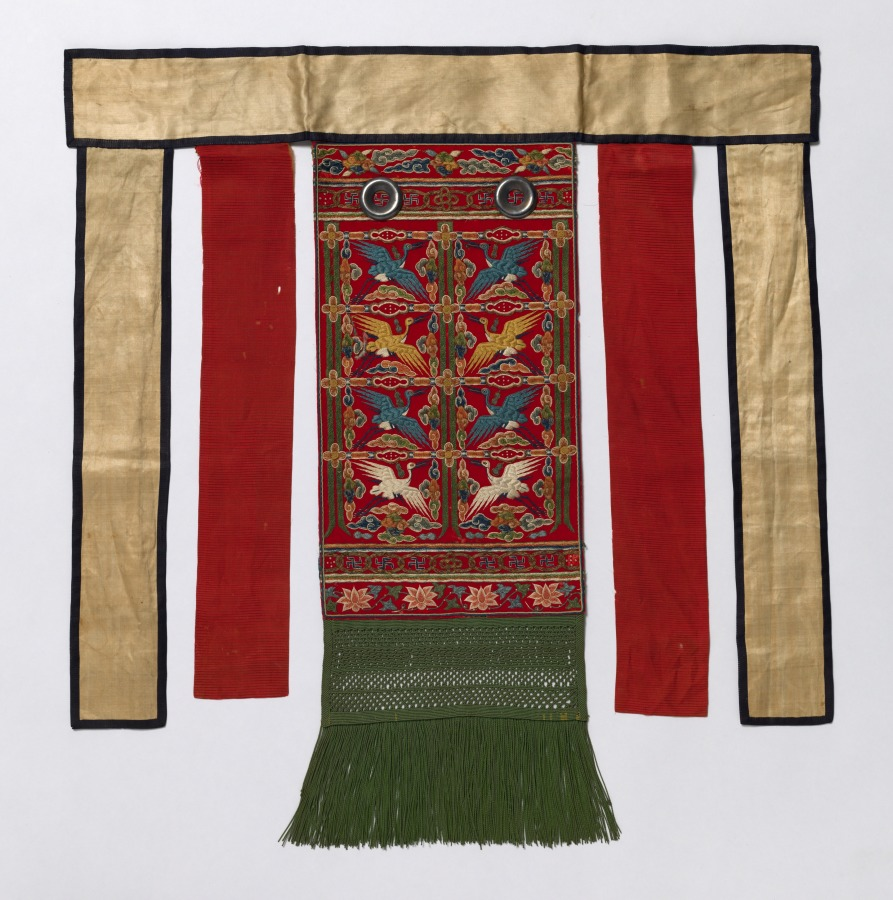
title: Back Apron for the Royal Ceremonial Robe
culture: Korea, Joseon dynasty (1392–1910)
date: late 1800s–early 1900s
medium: red pile weave, wool or silk, embroidered with silk (polychromatic); red silk, gauze weave; white silk, gauze weave; green silk fringe; metal ring embellishments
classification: Garment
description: This is a set of royal ceremonial robe and accessories worn by a high-ranking court official for attending special state ceremonies. The set consists of an inner coat, an outer coat, a skirt, a back apron, a crown, a pair of jade tassels, a tablet, and a belt.